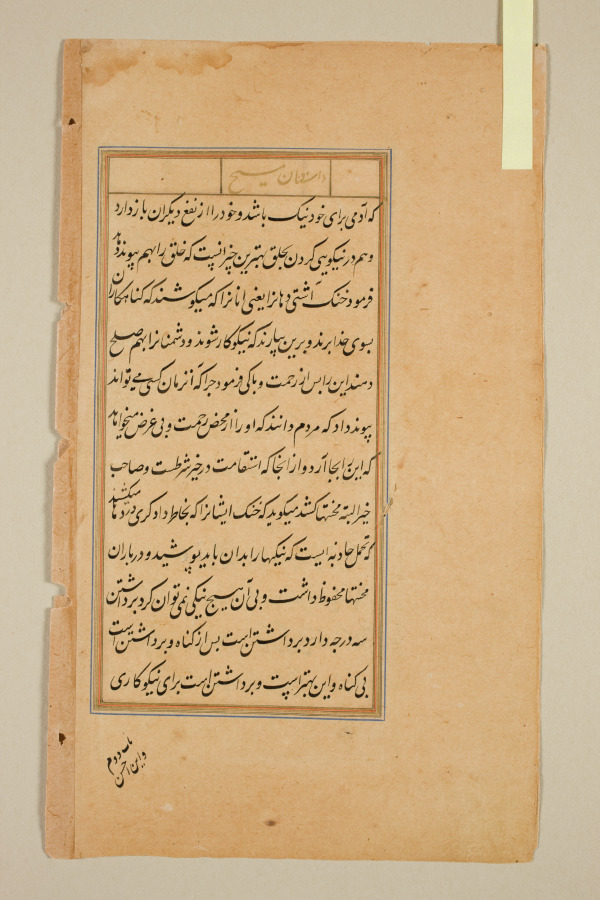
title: Text page from a Mirror of Holiness (Mir’at al-quds) of Father Jerome Xavier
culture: Mughal India, Allahabad, made for Prince Salim (1569–1627)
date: 1602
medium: Ink and gold on paper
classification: Manuscript